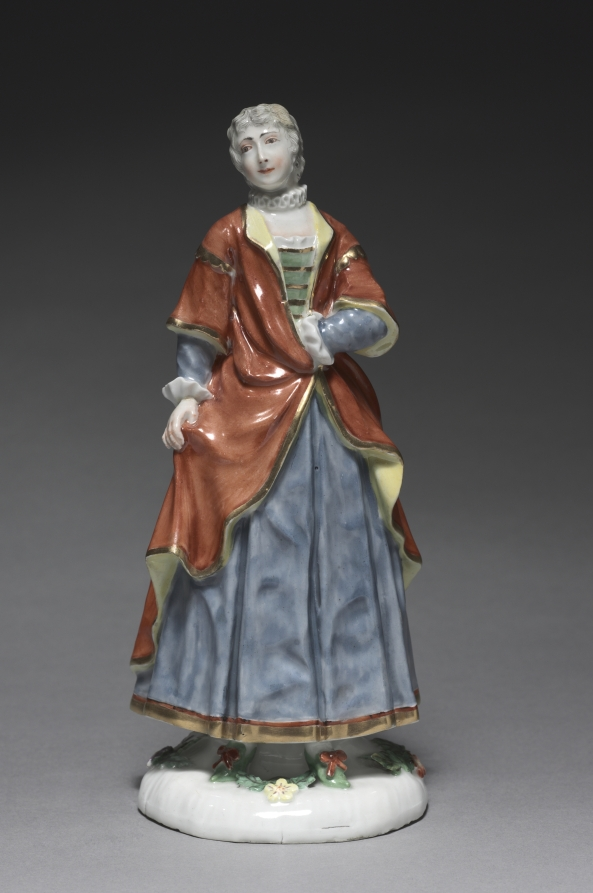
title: Italian Comedy Figure: Isabella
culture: Germany, Brunswick, 18th century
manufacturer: Fürstenberg Porcelain Factory (German)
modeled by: Simon Feilner (German, 1798)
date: c. 1753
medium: porcelain with enamel decoration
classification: Ceramic